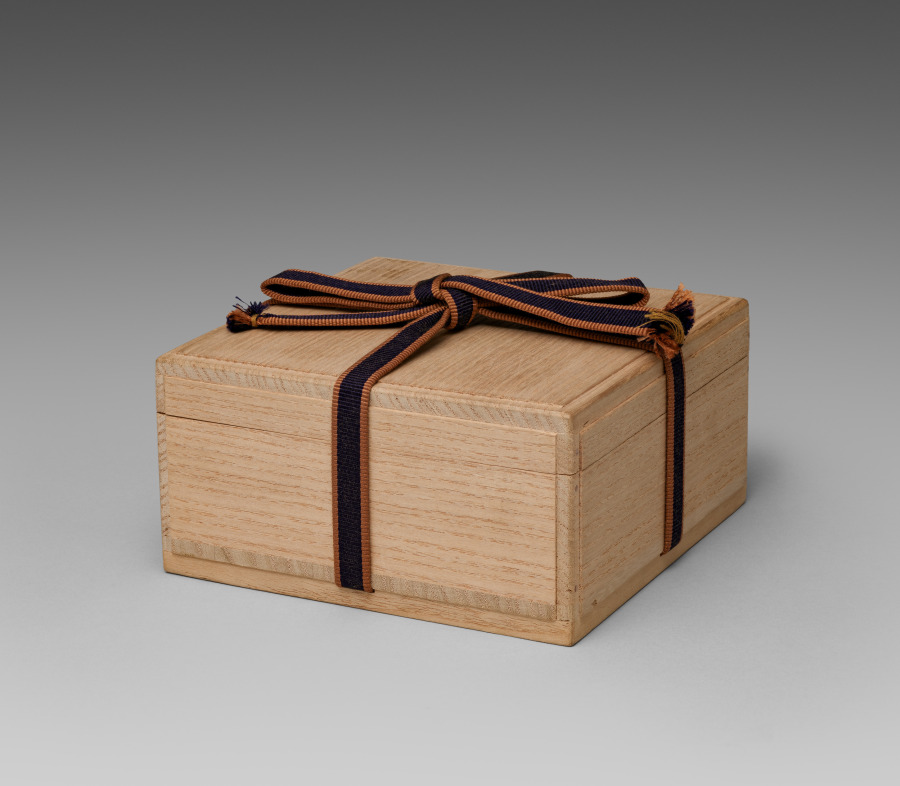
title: Celadon Dish with Molded Phoenix Design in the Shape of a Flower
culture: Korea, Goryeo dynasty (918–1392)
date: 1200s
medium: Celadon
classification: Ceramic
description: Celadon wares intended for everyday use—such as this dish—were among the most common burial objects placed in tombs during the Goryeo period (918–1392). Furnishing tombs with elaborate assemblages of objects was believed to honor the deceased and provide comfort in the afterlife. This dish, featuring the image of a flying phoenix, was likely a cherished possession that accompanied its owner to their final resting place.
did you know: The phoenix motif at the center of this dish symbolizes cosmic harmony and prosperity in traditional East Asian cultural and artistic expression.